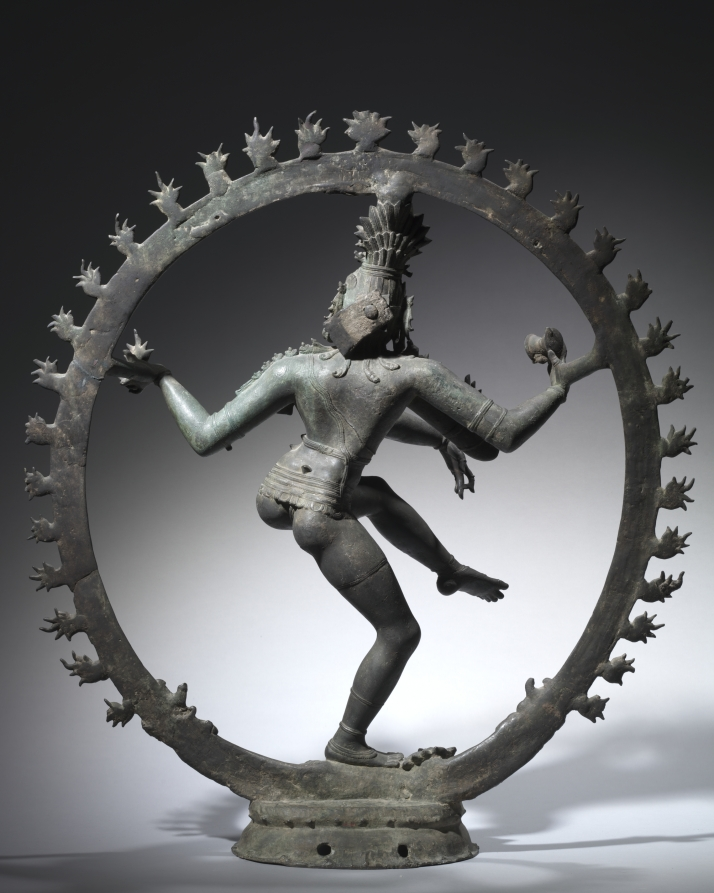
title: Nataraja, Shiva as the Lord of Dance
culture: South India, Tamil Nadu, Chola period (900-1200s)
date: 1000s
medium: Bronze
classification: Sculpture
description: One of the most celebrated sculptural forms in the history of Indian art, this elegant and dynamic figure embodies some of Hinduism’s most fundamental tenets. According to Hindu thought, time is cyclical; the world is created, maintained, preserved for a time, then destroyed, only to be created again an infinite number of times. For those Hindus who view Shiva to be the all-powerful creator divinity, he is responsible for both creation and destruction. The ring of fire and the tongue of flame he holds in his left hand refer to destruction, and the drum in his raised right hand refers to the relentless beat of time as it moves inevitably forward. His lower right hand, held up with the palm facing out, signals to his devotees not to be afraid of the impending destruction; they can be liberated from the cycles of birth and death through devotion to him, which he indicates by pointing to his upraised foot. With every step in his dance, he lands on a dwarfish figure personifying ignorance.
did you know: The trampled figure holds a serpent in his left hand and with his right points up to Shiva.